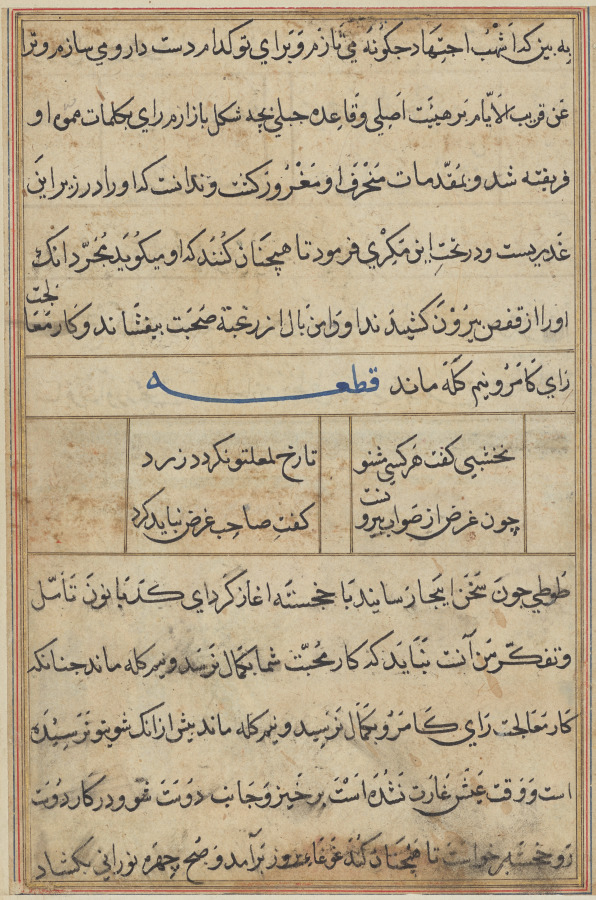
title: Page from Tales of a Parrot (Tuti-nama): text page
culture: Mughal India, court of Akbar (reigned 1556–1605)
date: c. 1560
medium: gum tempera, ink, and gold on paper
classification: Painting